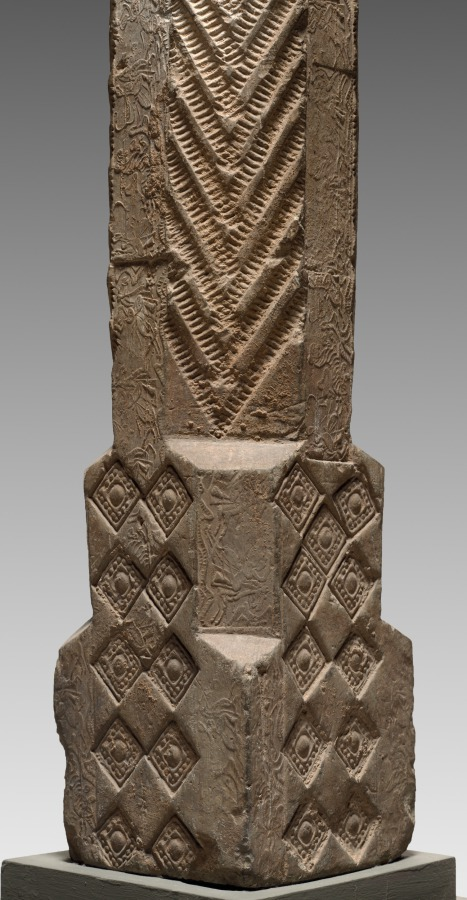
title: Hollow Tile: Column from Tomb-Chamber Doorway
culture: China, Han dynasty (202 BCE–220 CE)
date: 100–200 CE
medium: earthenware, die-stamped relief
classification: Ceramic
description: Striding tigers (top), racing horsemen (right column), and reverent officials (left column) are stamped into the surface of this underground portal to a tomb. The doorway preserves in stone the post-and-lintel structure, a basic element of Chinese wooden architecture. By the first century CE, a revolution in Chinese tomb construction and furnishing had taken place. Tombs lined with decorated bricks and tiles replace the earlier tombs constructed with only rammed-earth walls. Ceramic surrogates or models of stoves, houses, servants, and pets filled these more durable chambers, symbolically extending the creature comforts of this world into the world after death.